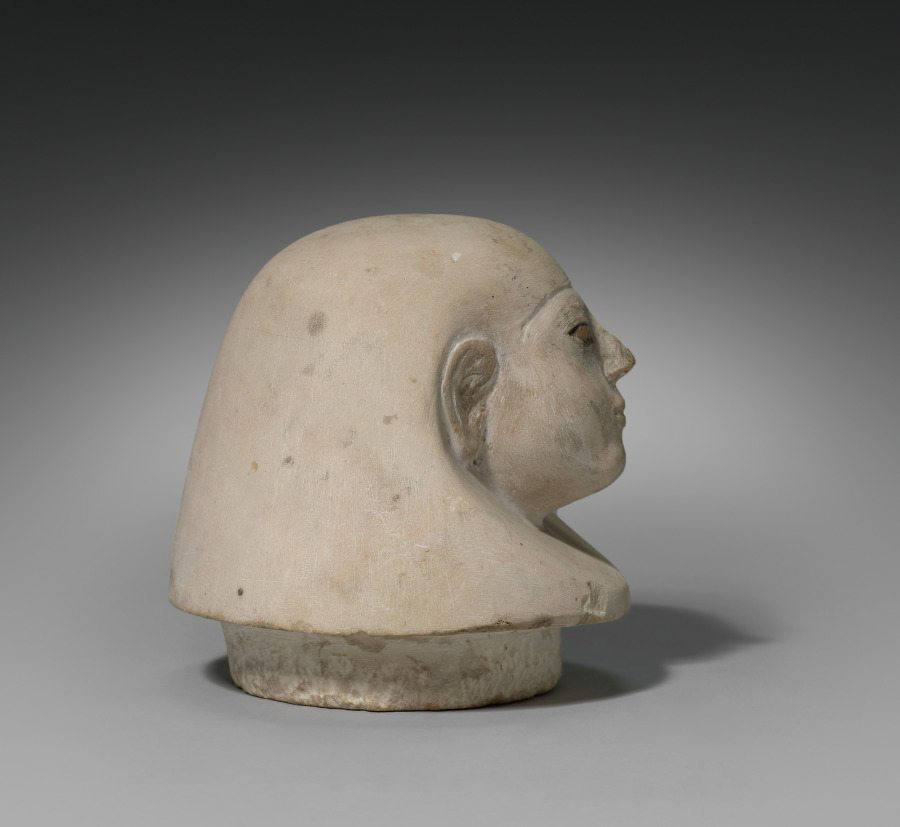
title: Canopic Jar with Lid (lid)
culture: Egypt, New Kingdom (1540–1069 BCE), Dynasty 18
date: 1540–1296 BCE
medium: limestone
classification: Funerary Equipment